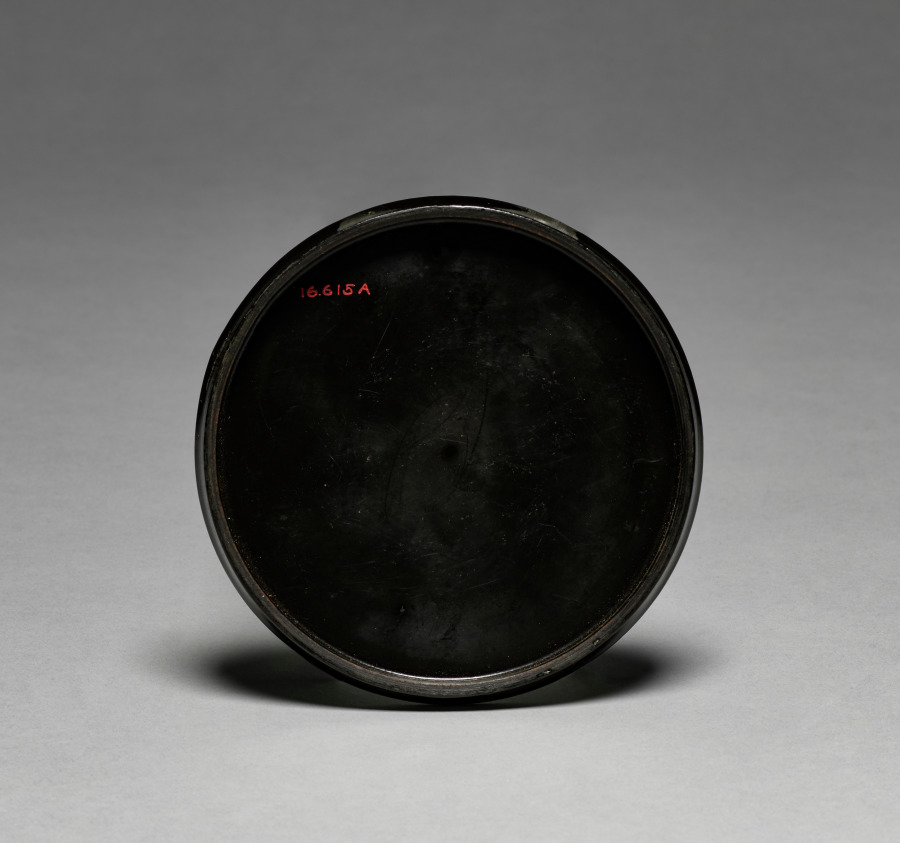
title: Cover for a Box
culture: Germany, late 18th Century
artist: possibly studio or workshop of Johann Heinrich Stobwasser (German, 1740–1829)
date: late 1700s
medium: lacquered wood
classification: Miscellaneous